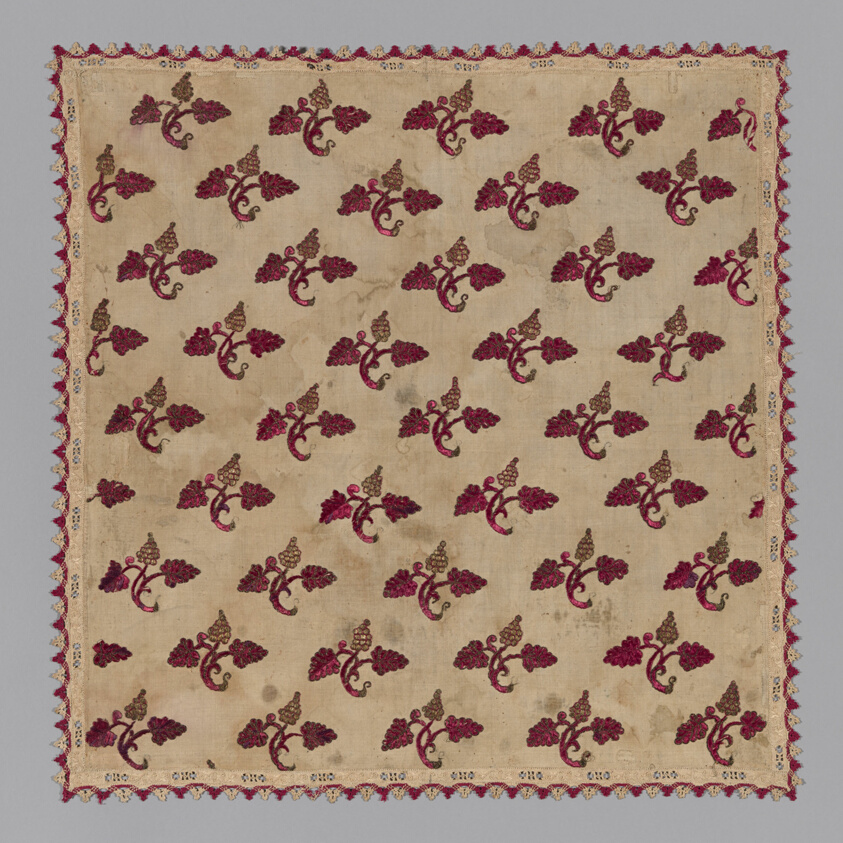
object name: Textile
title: Cover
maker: Italy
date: 1601/25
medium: Linen, plain weave; embroidered with silk and gilt-metal-strip-wrapped silk in back, hem, overcast, satin, and single satin stitches; edged with linen, needle lace worked on a plain weave cut and drawn thread work grid; and linen and silk, bobbin straight lace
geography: Italy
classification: textile; needlework (visual works)